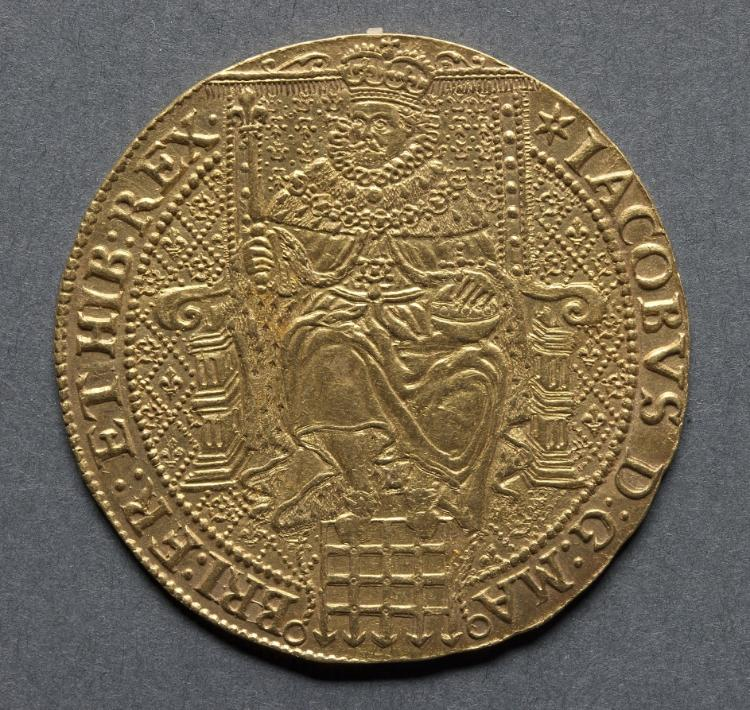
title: Rose Ryal: James I (obverse)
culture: England, James I, 1603-1625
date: 1619–1620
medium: gold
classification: Coins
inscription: IACOBUS DG MA BRI FR ET HI REX